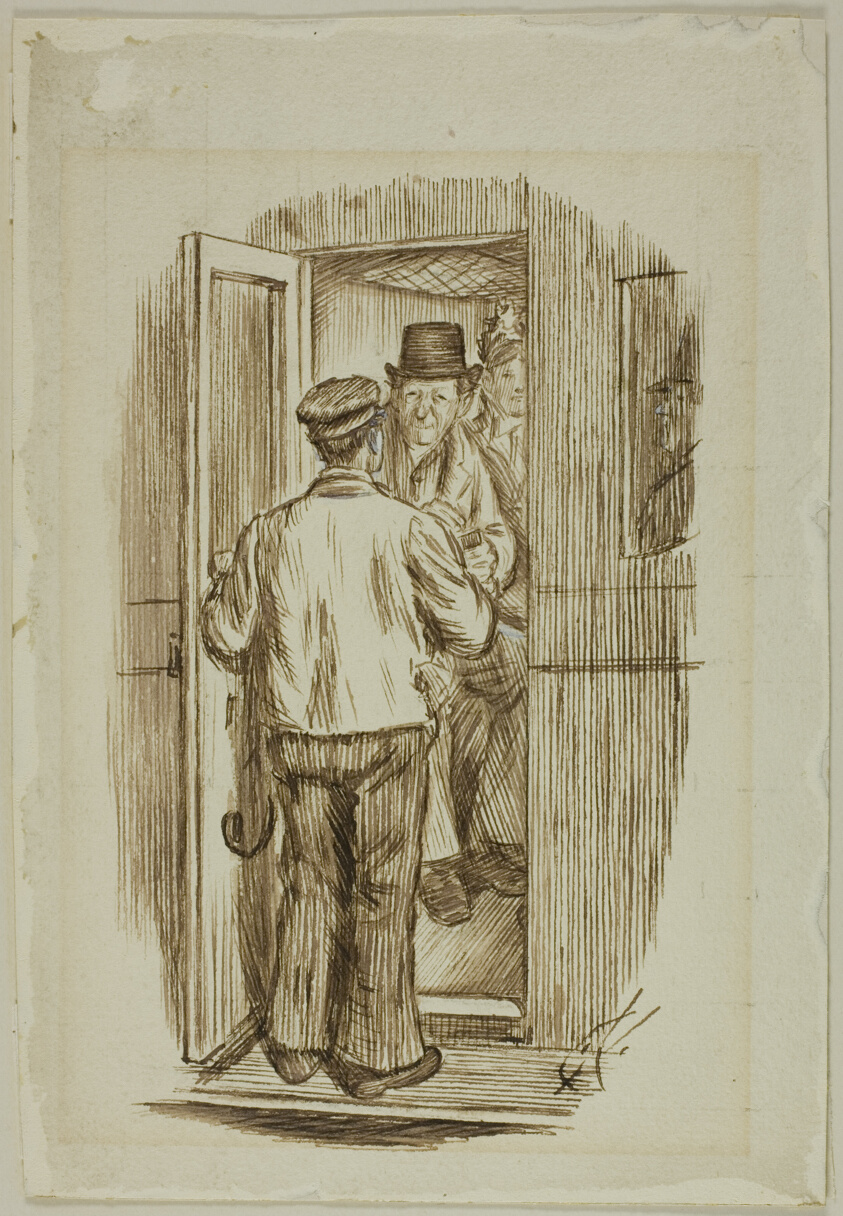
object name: Drawing and Watercolor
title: Cannie!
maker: Charles Samuel Keene (British, 1823-1891)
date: 1870/91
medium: Pen and brown ink, with brush and brown wash and touches of white gouache, on ivory wove paper, laid down on ivory wove card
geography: England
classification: pen and ink drawings; drawings (visual works); prints and drawing